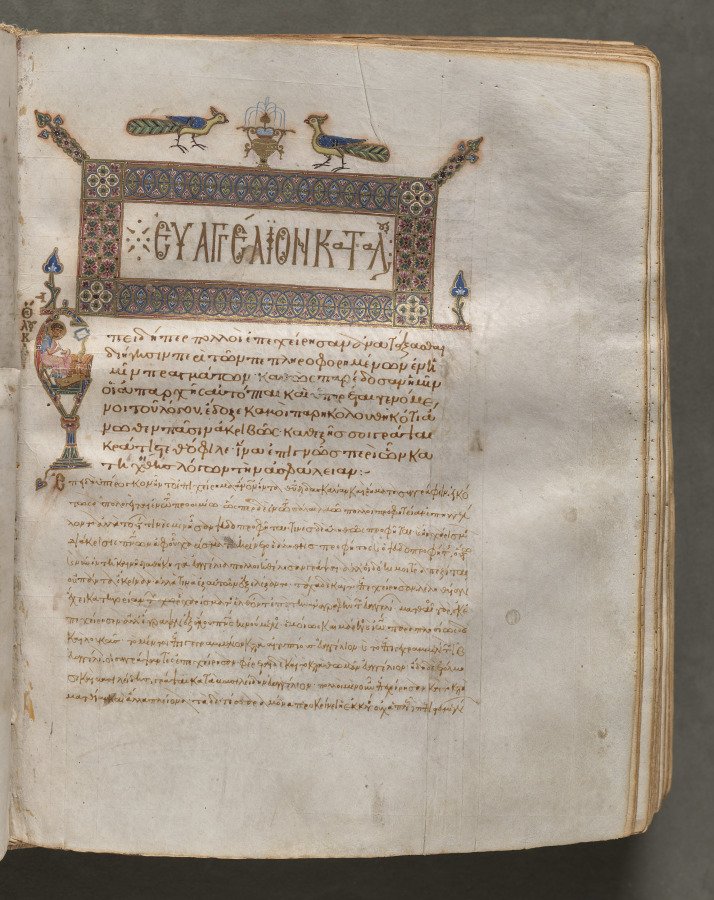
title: Portrait of Luke, folio 200 (recto), from a Gospel Book with Commentaries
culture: Byzantium, Constantinople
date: c. 1000–1100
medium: ink, tempera, and gold on vellum; leather binding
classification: Bound Volume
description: Each of the four gospels in this book opens on a page with brilliantly illuminated borders depicting the author of the text as well as birds-principally peacocks, symbols of the immortality of the soul-and fountains, representing the fountain of life and the salvation of the soul. This volume consists of 428 leaves with texts in Greek. Its level of sophistication suggests that it was probably written and decorated in a monastery in Constantinople.